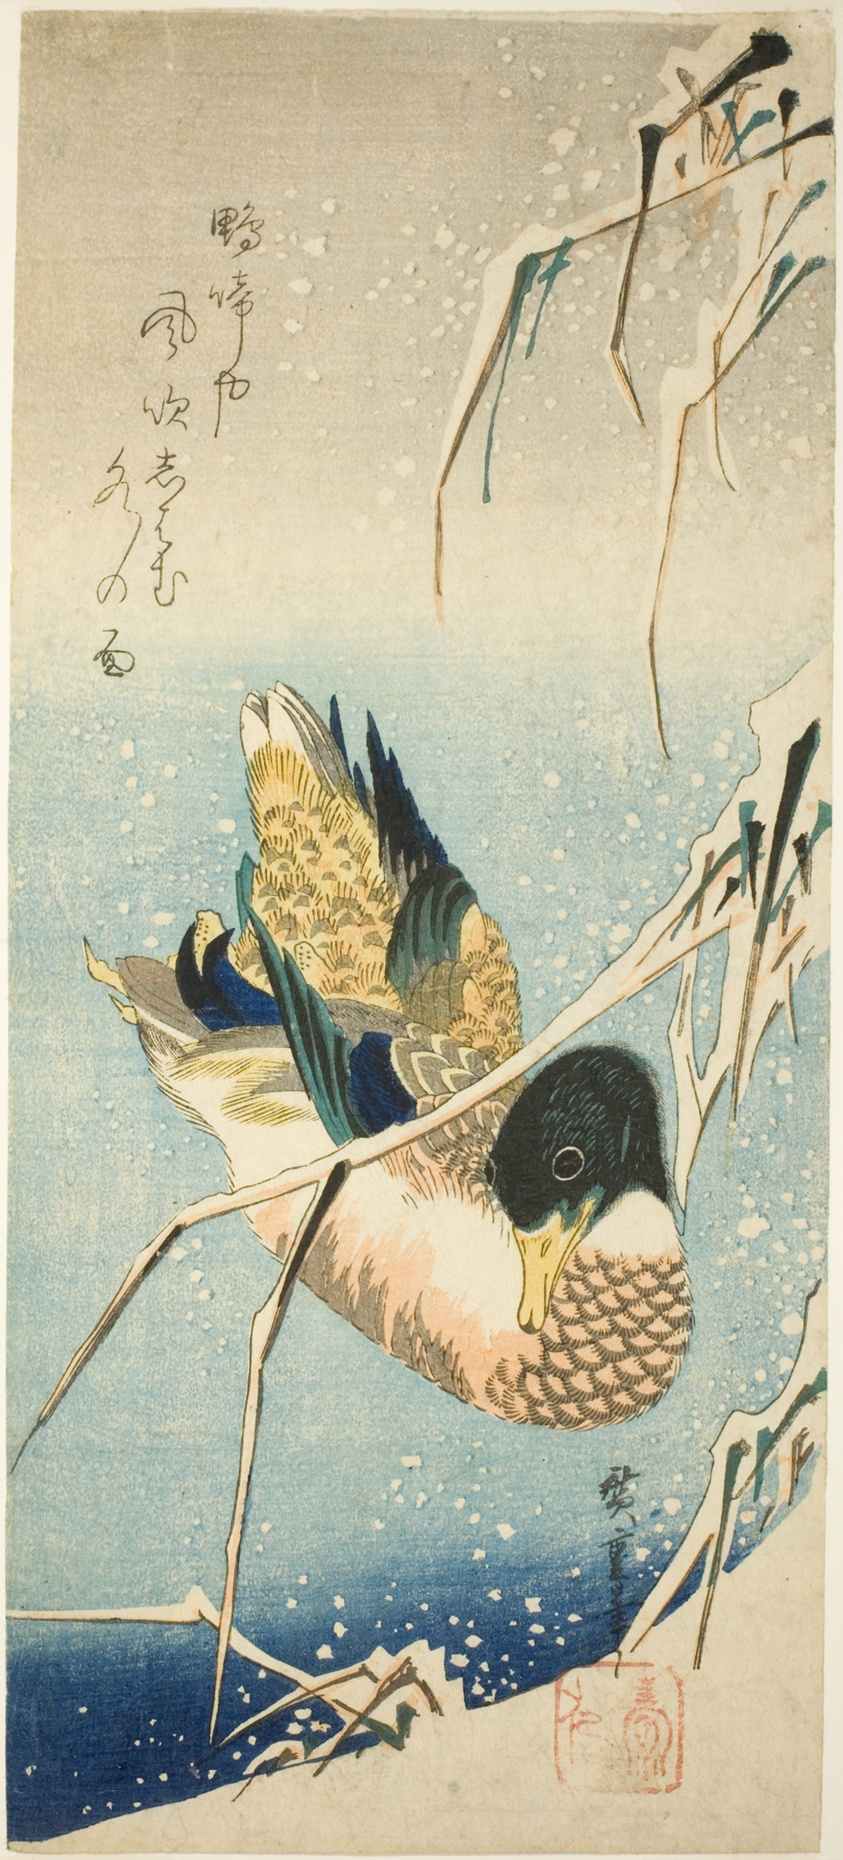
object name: Print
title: A Wild Duck Swimming by a Snow-covered Bank beneath Snow-laden Reeds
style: Japanese (culture or style)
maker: Utagawa Hiroshige 歌川 広重; Japanese, 1797–1858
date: 1830s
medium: Color woodblock print; o-tanzaku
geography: Japan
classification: woodblock print; print; asian art